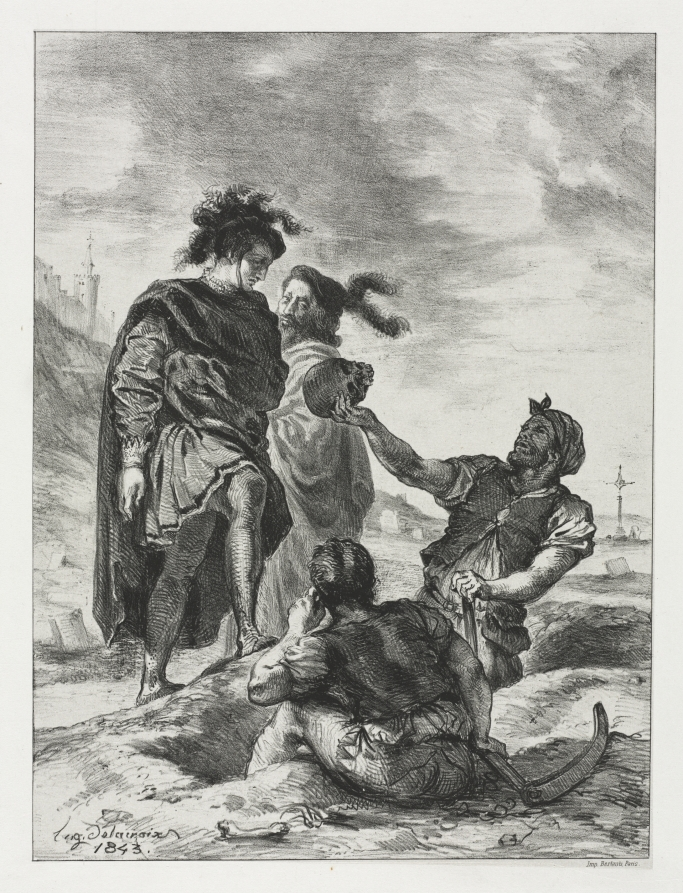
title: Hamlet: Hamlet and Horatio with the Grave Diggers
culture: France, 19th century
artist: Eugène Delacroix (French, 1798–1863)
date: 1843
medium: lithograph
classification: Print